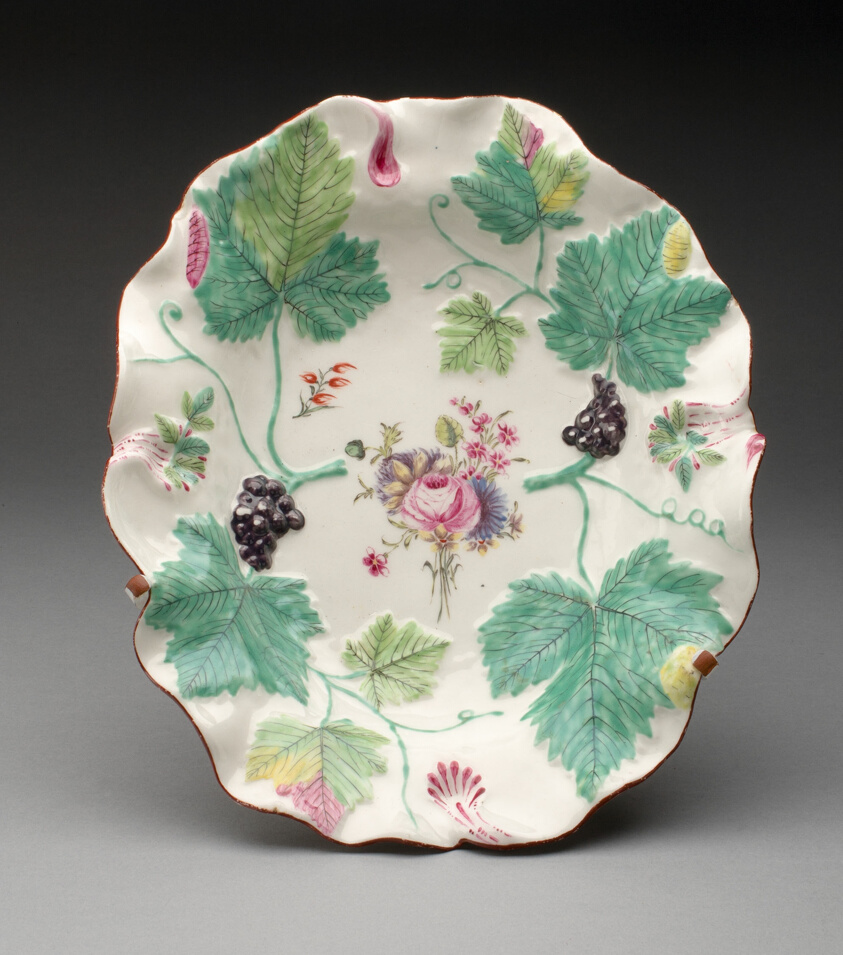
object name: Ceramics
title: Dish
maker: Chelsea Porcelain Manufactory; London, England, c. 1745-1784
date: c. 1760 or probably later copy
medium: Soft-paste porcelain, polychrome enamels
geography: Chelsea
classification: dish (vessel); ceramics; porcelain; european decorative arts